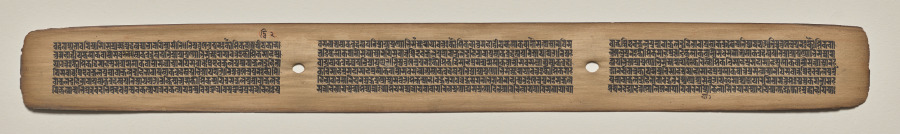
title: Text, folio 45 (recto), from a Manuscript of the Perfection of Wisdom in Eight Thousand Lines (Ashtasahasrika Prajnaparamita-sutra)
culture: Eastern India, Bihar, Vikramashila Monastery. Painting: Nepal, Kathmandu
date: Sunday, September 14, 1119 (year 239 of the Newar Samvat in the month of Ashvina)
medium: gum tempera and ink on palm leaves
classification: Painting